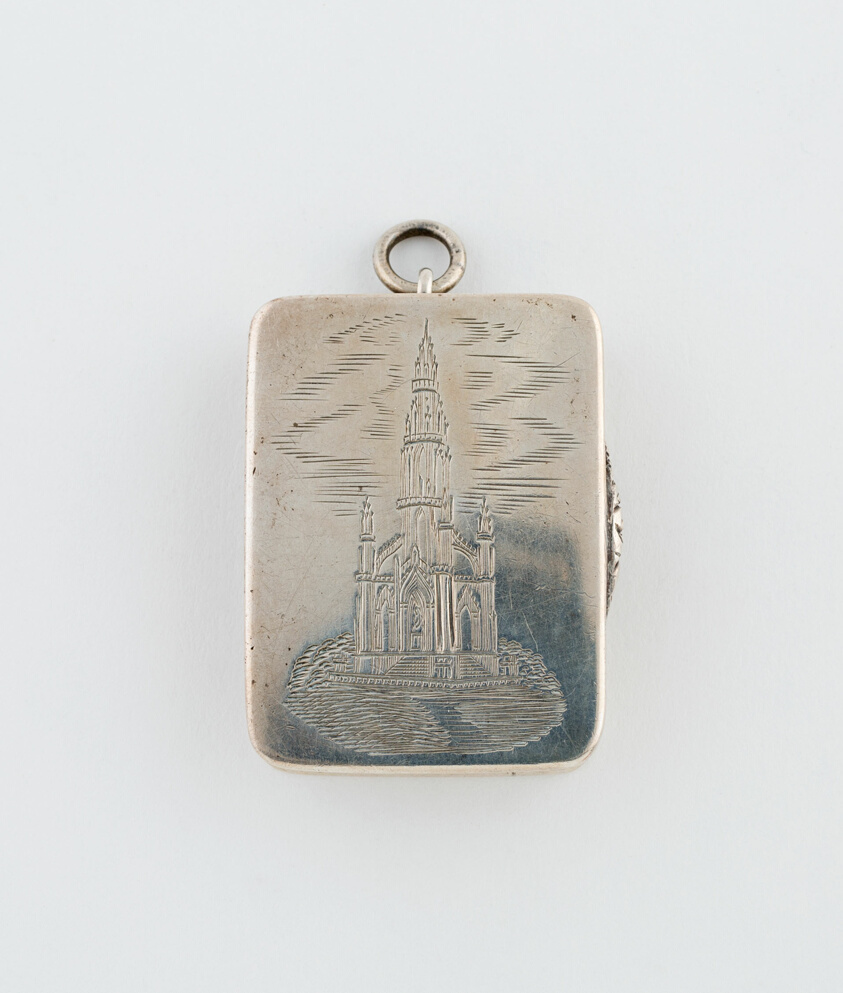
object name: Metalwork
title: Vinaigrette with View of Sir Walter Scott Memorial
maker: Marked CC; Birmingham, England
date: 1870/71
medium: Silver and silver gilt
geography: Birmingham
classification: container for personal use; vinaigrette (container for health care); european decorative arts; metalwork; silver; decorative object/ornament